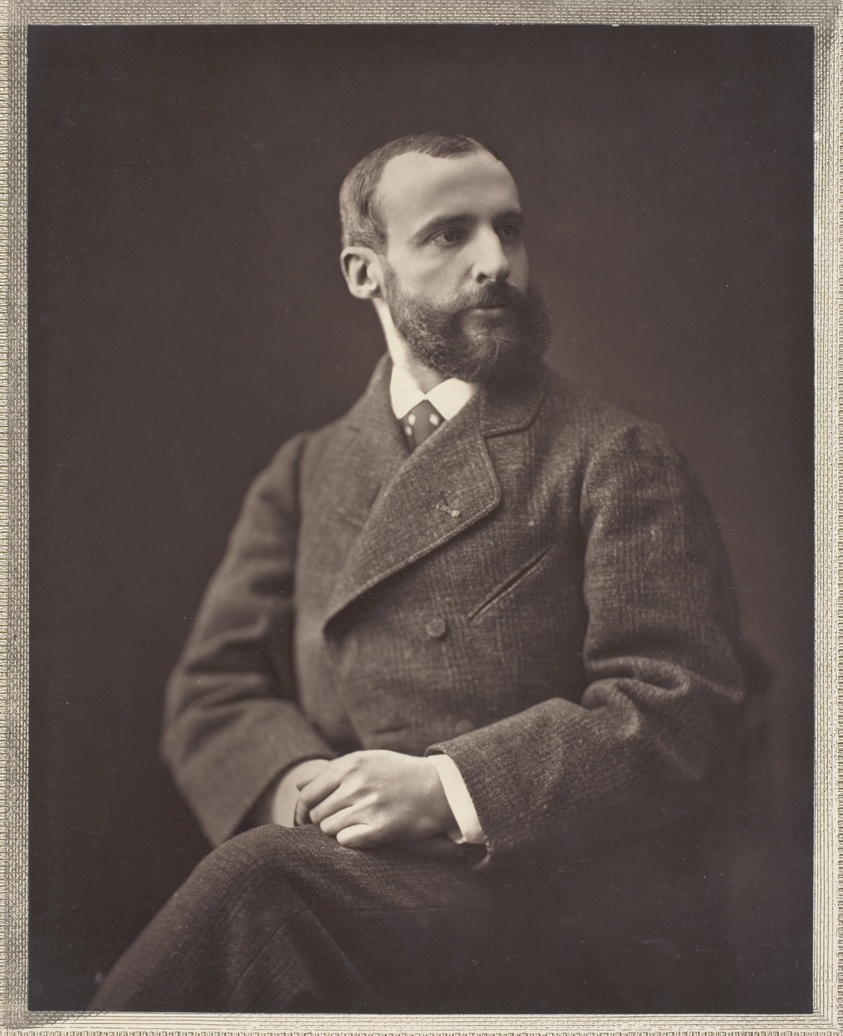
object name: Photograph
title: Francis Planté (French pianist, 1839-1934)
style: 19th century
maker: Nadar (Gaspard Félix Tournachon) (French, 1820–1910)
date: 1865/73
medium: Woodburytype, from the periodical “Galerie Contemporaine Littéraire, Artistique” (1878), volume 5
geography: France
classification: woodburytype; photomechanical process; photography; photograph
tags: Collected by Hugh Edwards, Contemporaine Littéraire